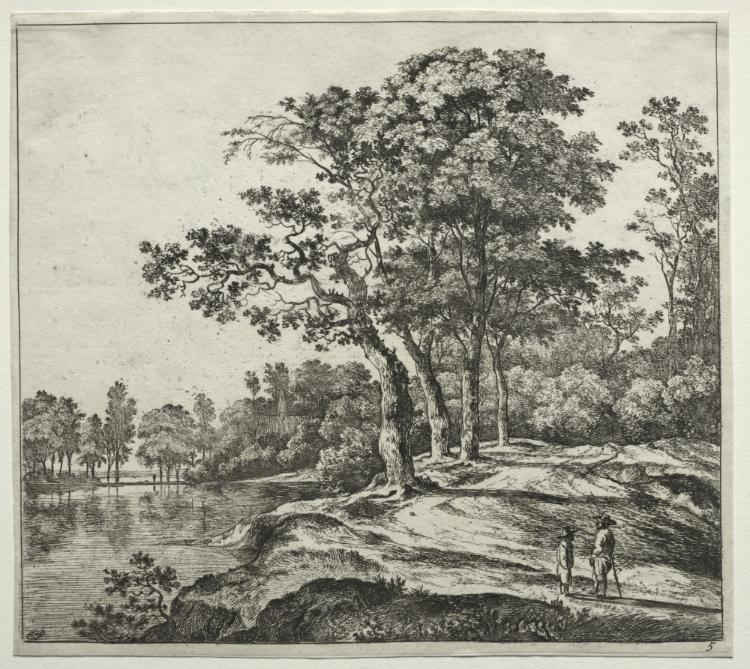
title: The Four Trees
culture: Netherlands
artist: Jan Hackaert (Dutch, 1629–c. 1700)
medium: etching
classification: Print